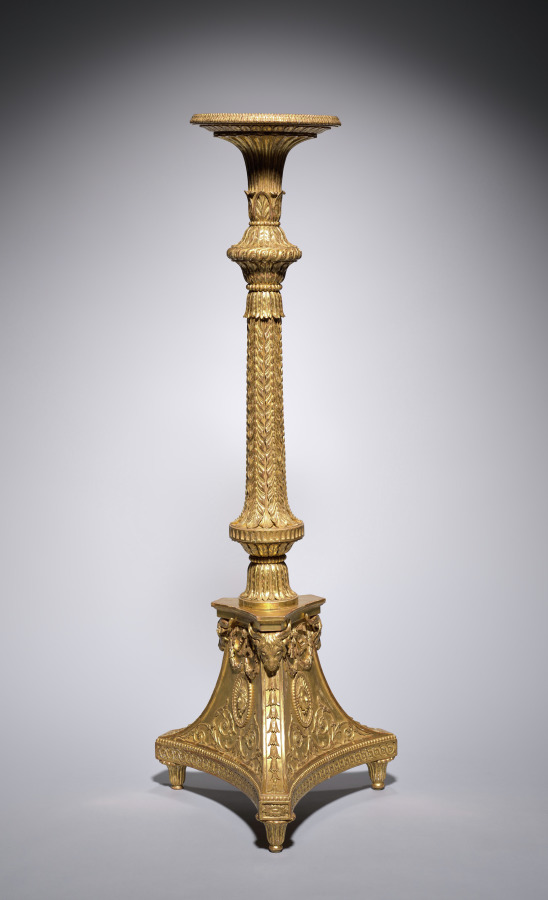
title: Candle Stand (torchère) (1 of 2)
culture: England, 18th century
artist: Thomas Chippendale (British, 1718–1779)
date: c. 1773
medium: Gilt-wood, gesso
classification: Furniture and woodwork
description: This gilded candle stand was made by Thomas Chippendale, the most renowned cabinetmaker in eighteenth-century London, for the grand drawing room of Brocket Hall, a large country house in Hertfordshire, England. With finely carved acanthus leaves, swags, fluting, and oval masks depicting the Roman goddess Diana, this candle stand exhibits Chippendale’s masterful understanding of neoclassical proportion, scale, and ornament. His landmark book of furniture designs, The Gentleman and Cabinet-Maker’s Director (first published in 1754), was highly admired as a source of inspiration by cabinetmakers and architects around England as well as in Europe and America.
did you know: Candle stands usually held silver or crystal candelabra that were lit for evening entertainment.